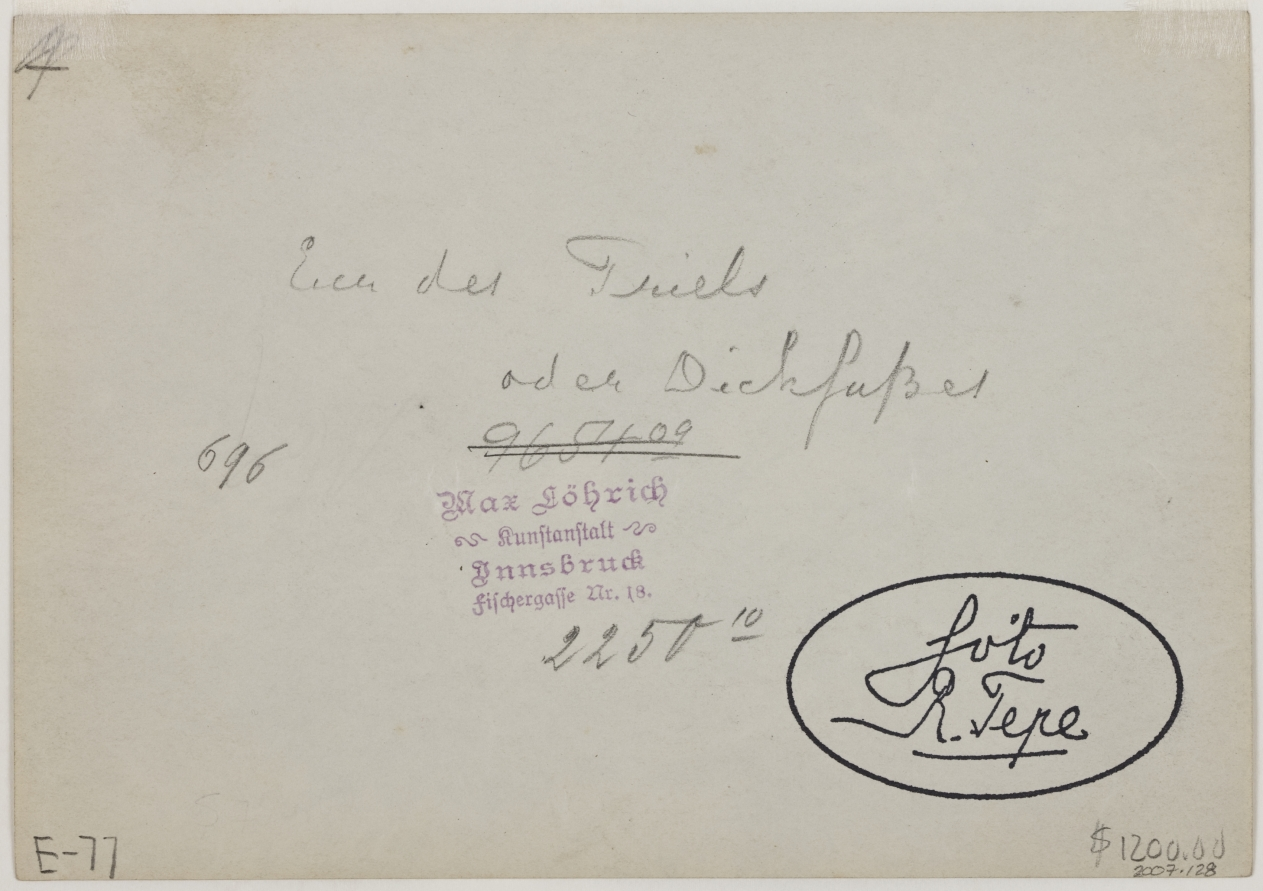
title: Eggs of a Stone-curlew or Plover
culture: Netherlands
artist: Richard Tepe (Netherlandish, 1864–1952)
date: 1900s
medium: silver print on printing out paper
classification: Photograph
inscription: Written in pencil on verso: "2250 10" Written in black ink on verso: "Foto/R.Tepe (signed)"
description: Dedicated to wildlife and natural habitat preservation, Tepe helped bring nature photography into the fine art world. He exhibited his photographs and published articles and pictures in both natural history and art magazines.